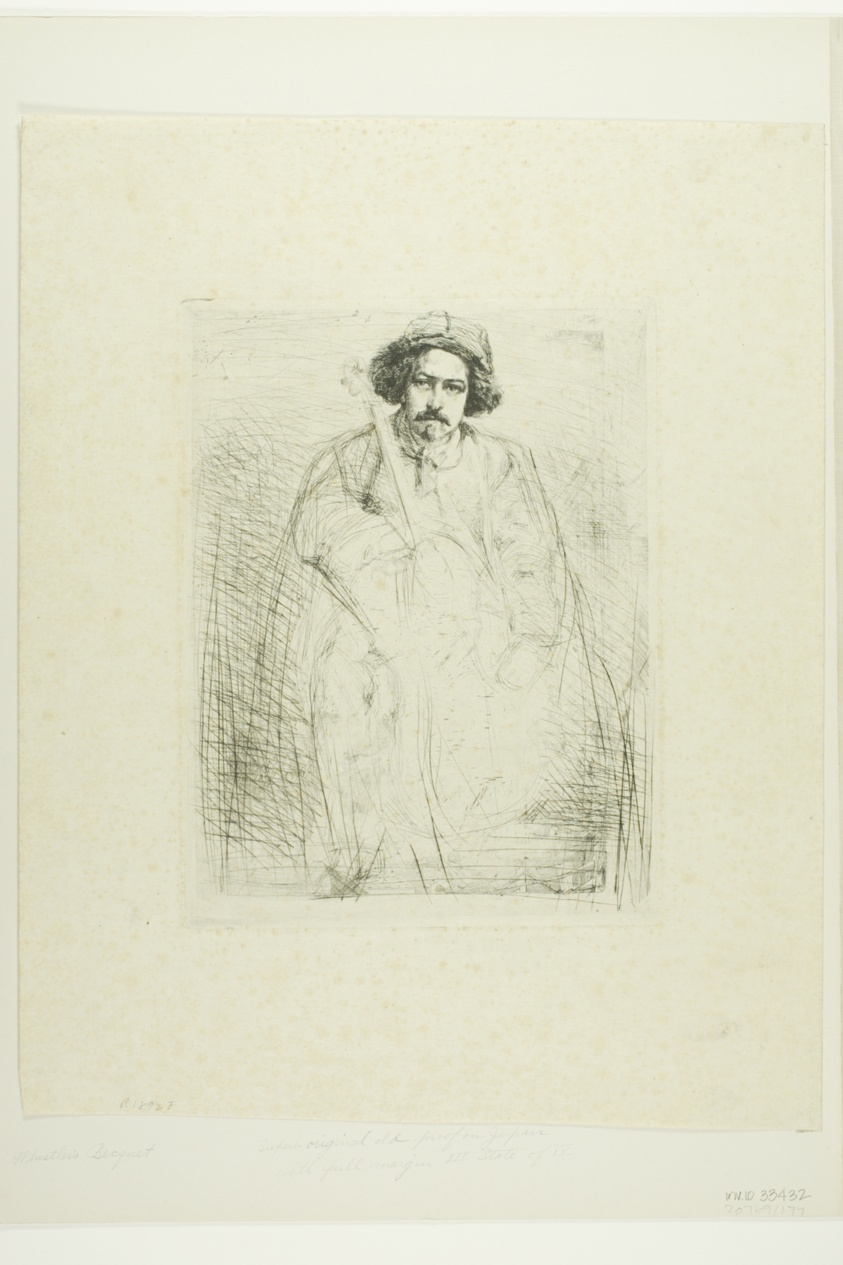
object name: Print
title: J. Becquet, Sculptor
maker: James McNeill Whistler (American, 1834-1903)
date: 1859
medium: Etching and drypoint with foul biting in black ink on cream Japanese paper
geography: United States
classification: etching; drypoint; print; prints and drawing; foul biting; paper